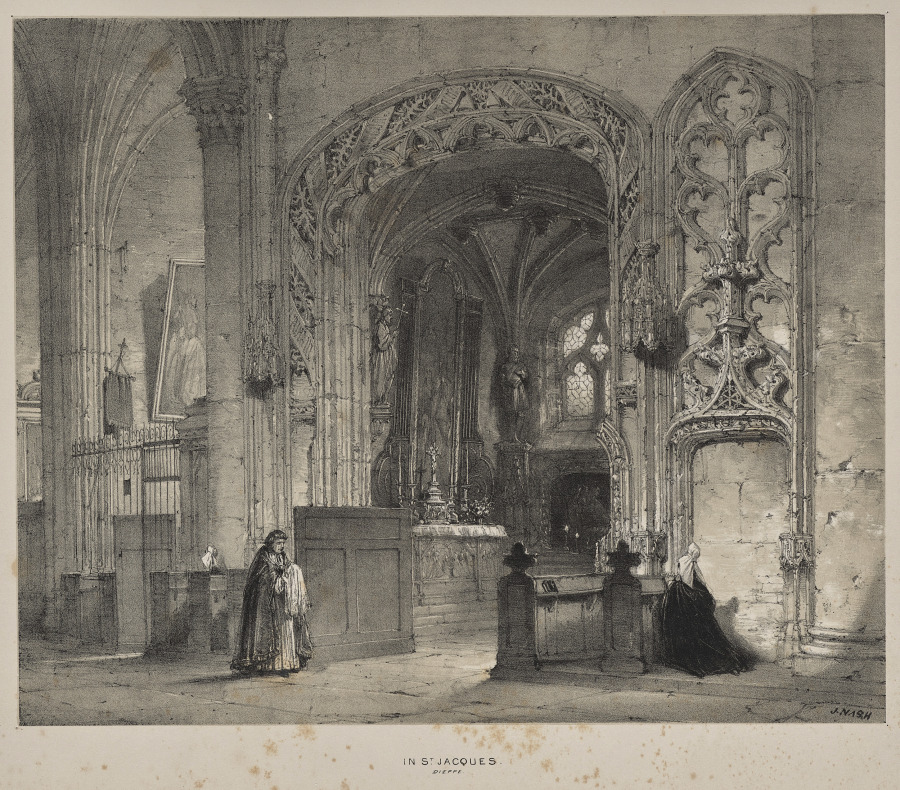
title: Architecture of the Middle Ages: Chapel in St. Jacques, Dieppe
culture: England, 19th century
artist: Joseph Nash (British, 1808–1878)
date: 1838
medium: lithograph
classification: Print